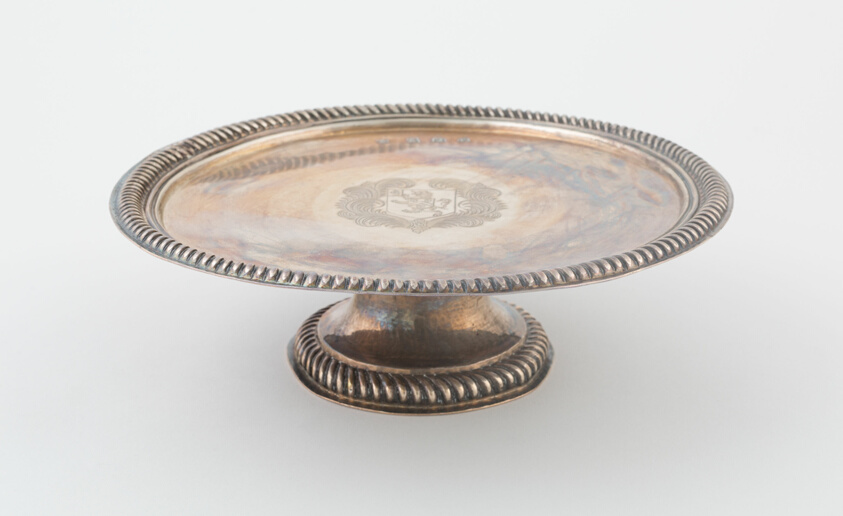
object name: Metalwork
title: Tazza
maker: Joseph Ward; English, active 1680-1726; London, England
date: 1697/98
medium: Silver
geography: London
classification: silver; metalwork; european decorative arts